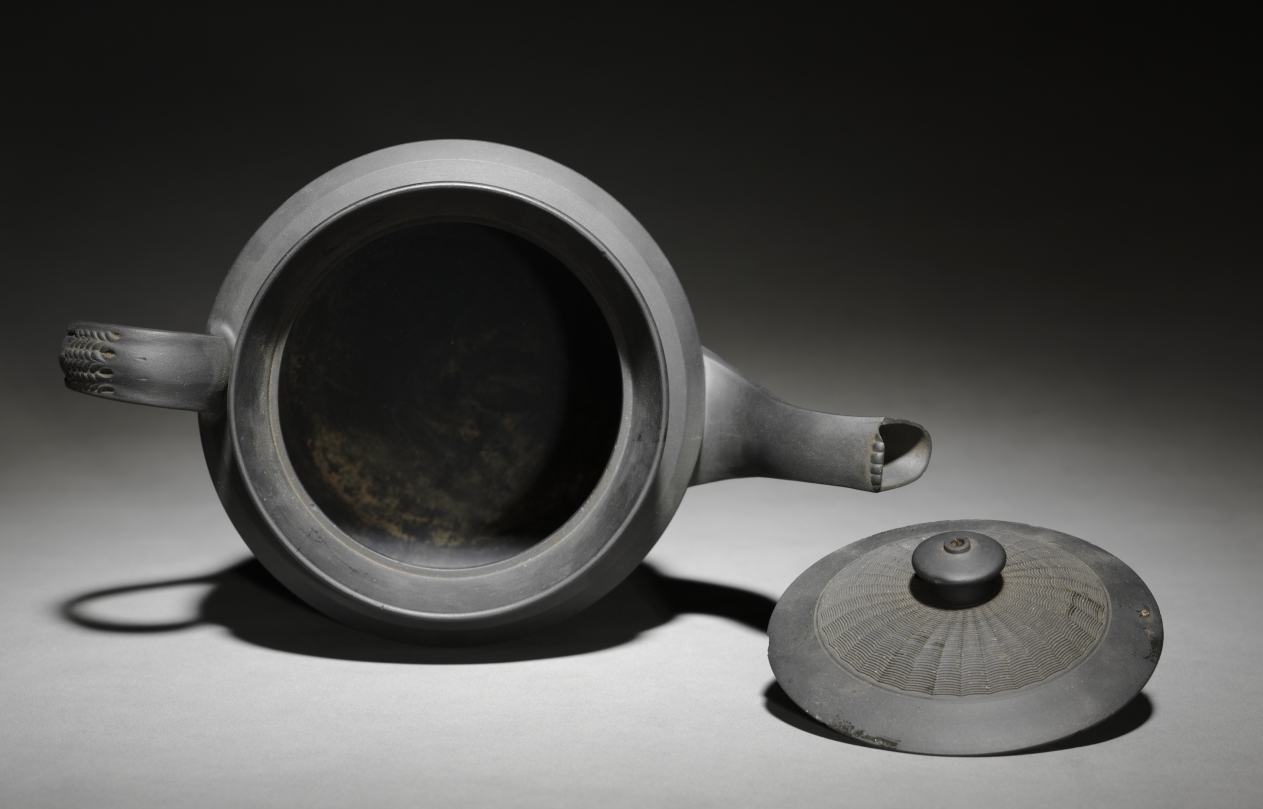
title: Teapot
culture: England, Staffordshire, 19th century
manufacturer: Davenport Pottery and Porcelain Factory (British)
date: 1800s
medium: black basalt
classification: Ceramic